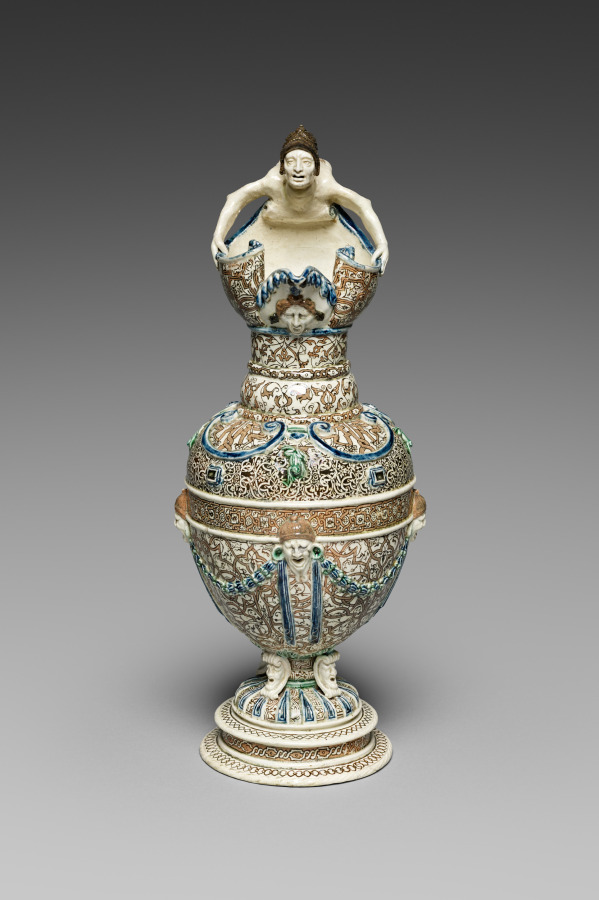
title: Ewer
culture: France, 16th century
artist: Saint-Porchaire (French)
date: c. 1540–67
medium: lead-glazed, white-paste earthenware with inlaid slip decoration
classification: Ceramic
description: An example of one of the most extravagant wares of this kind, this ewer is decorated with applied masks and frogs as well as a variety of stamped and inlaid designs. The shape and patterns reflect the metalwork of the time—the final period of this artistic pottery.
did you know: The green tree frog was one of the symbols of French King Henri II, indicating that this ewer may have either been made for the king or one of his courtiers.